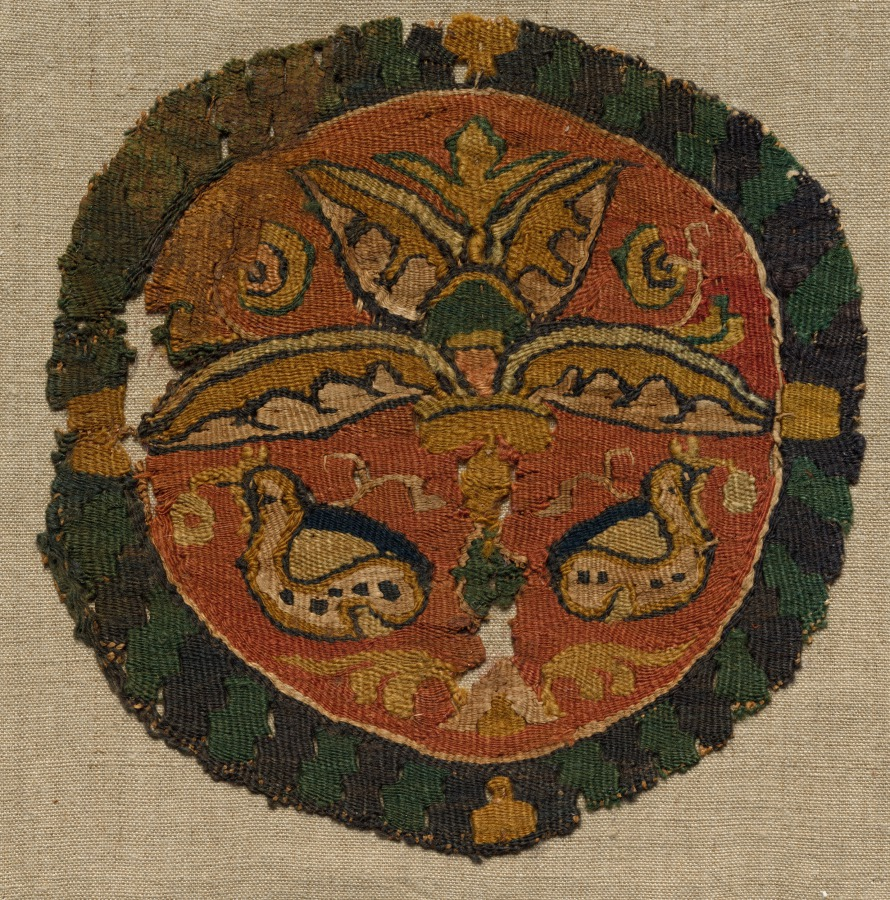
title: Segmentum from a Tunic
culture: Egypt, late Abbasid or Tulunid period, 9th century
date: 800s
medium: tapestry; wool and linen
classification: Textile